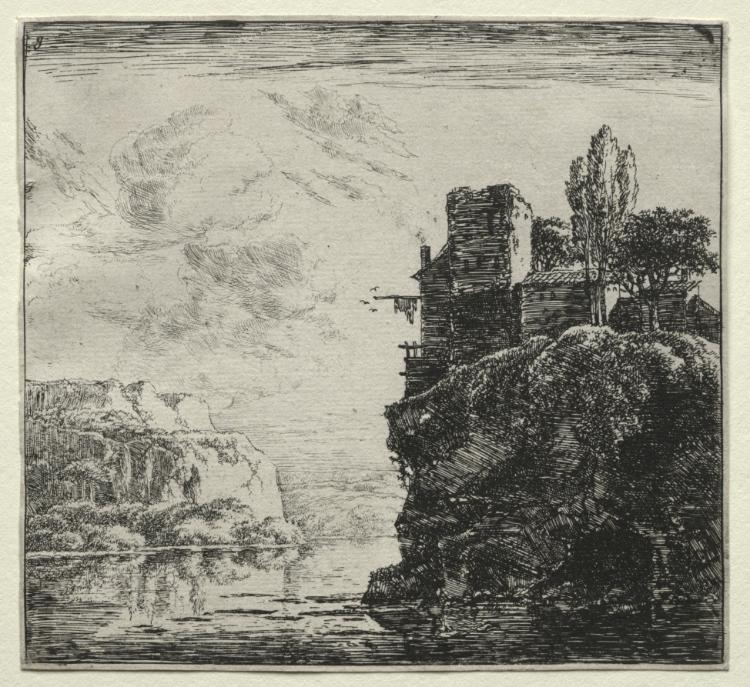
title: The River between the Rocks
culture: Flanders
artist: Herman Naiwincx (Flemish, c. 1624–after 1651)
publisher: Clement de Jonghe (Dutch, 1579–1679)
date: 1640–51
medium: etching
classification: Print